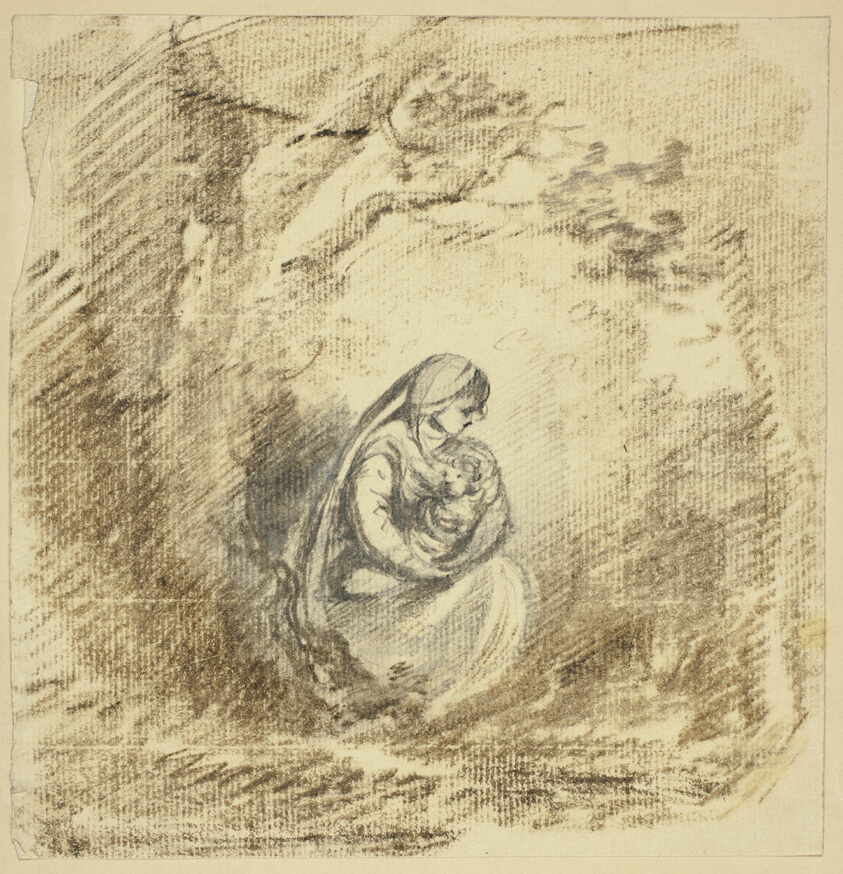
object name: Drawing and Watercolor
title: Mother and Child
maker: Unknown Artist (British, 18th century); or possibly Thomas Gainsborough (English, 1727-1788); or Richard Cooper II (English, born Scotland, 1740-1822)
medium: Graphite and brown chalk on cream laid paper, tipped onto tan wove paper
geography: England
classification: graphite; drawings (visual works); prints and drawing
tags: mothers, babies, children